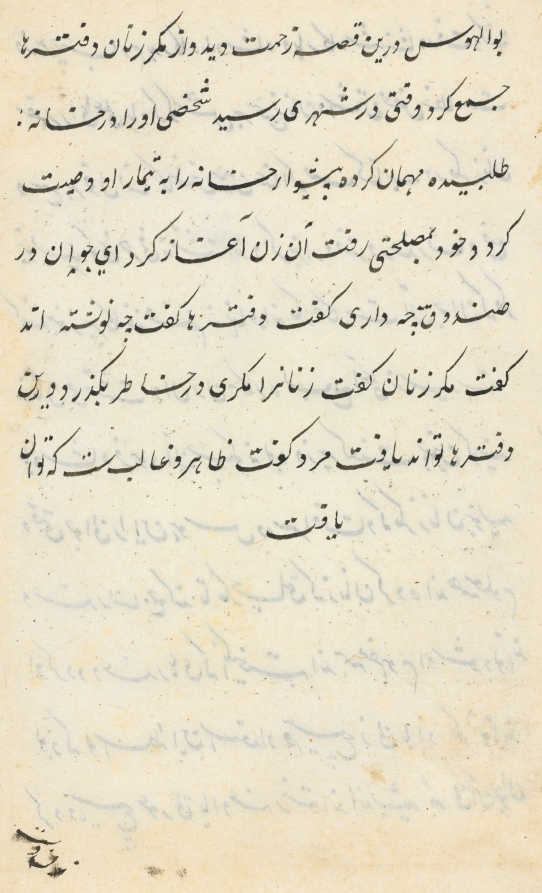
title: Page from Tales of a Parrot (Tuti-nama): text page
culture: Mughal India, court of Akbar (reigned 1556–1605)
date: c. 1560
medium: gum tempera, ink, and gold on paper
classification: Painting